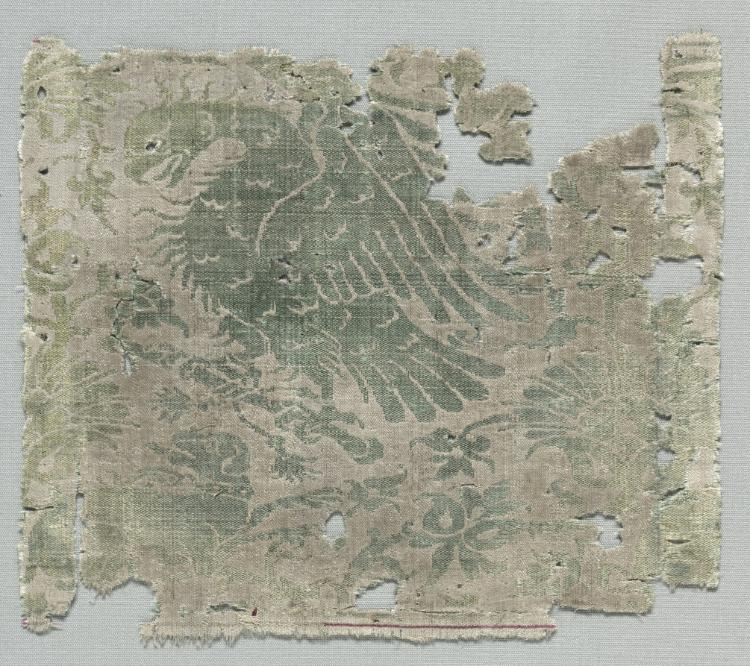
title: Silk Fragment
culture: Italy, last third of the 14th century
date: 1360–1399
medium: lampas weave, silk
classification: Textile